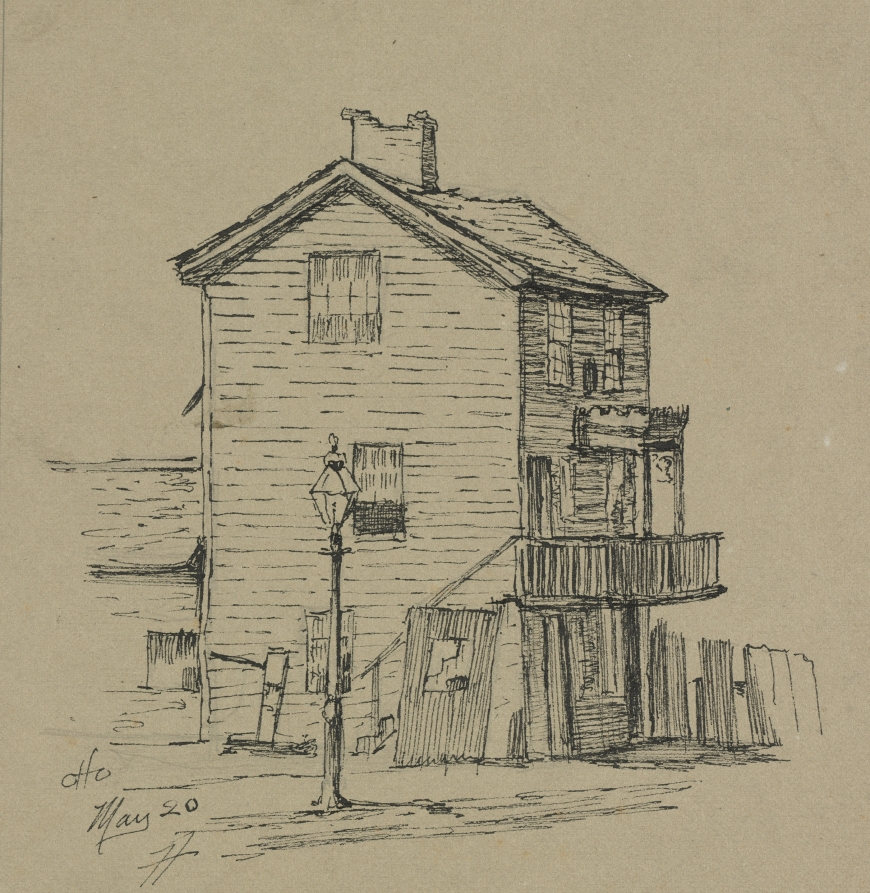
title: An Old House, Cleveland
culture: America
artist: Otto H. Bacher (American, 1856–1909)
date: c. 1870–1909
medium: ink on paper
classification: Drawing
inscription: Signed: "Otto, May 20"